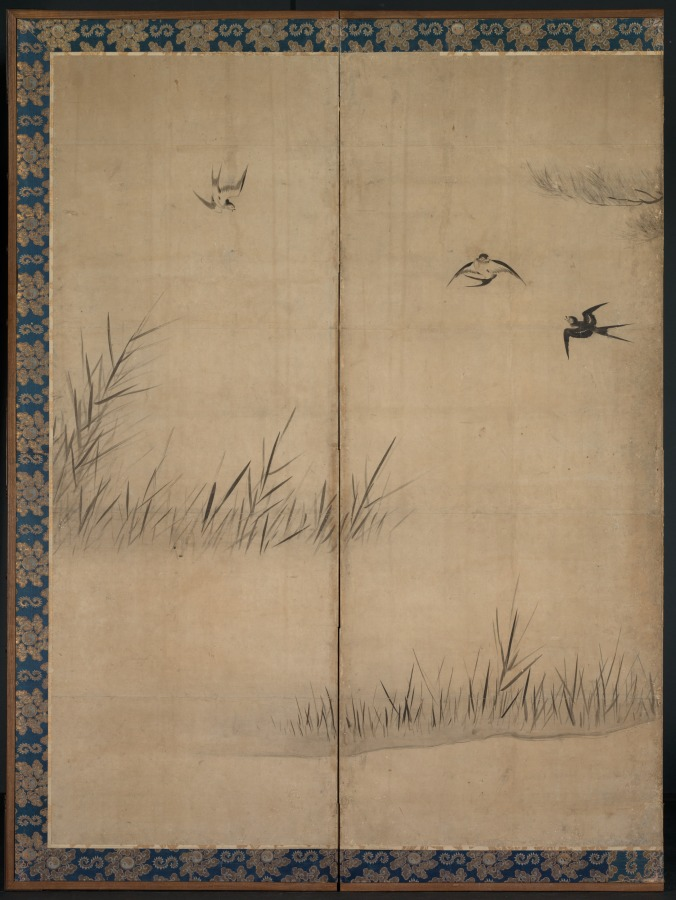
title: Wild Geese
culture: Japan, Edo period (1615–1868)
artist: Kano Sanraku (Japanese, 1559–1635)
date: late 1500s-early 1600s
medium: pair of six-fold screens; ink on paper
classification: Painting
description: Depictions of geese usually appear as ink paintings in Japan during the 1200s. They later show up in the colorful landscapes of illustrated handscrolls. Such early ink renditions of the birds have long been associated with classical Chinese Zen painting and poetry, which was avidly admired and collected in medieval Japan. In the screens on display, the artist portrayed the waterfowl in a pastoral setting without reference to classical or religious themes. Such ordinary subjects were imbued with special meaning in 14th- and 15th-century Japan through associations with continental culture, Zen thought and poetry, and famous Chinese monk-painters whose painting techniques had become revered as visual emblems of Zen principles. The screens here reflect the continuation of that painting tradition in the late 1500s or early 1600s by the head of the most important studio in Kyoto. Sanraku also executed a number of colorful folding screen compositions, but here pays homage to the style of early Zen painting.